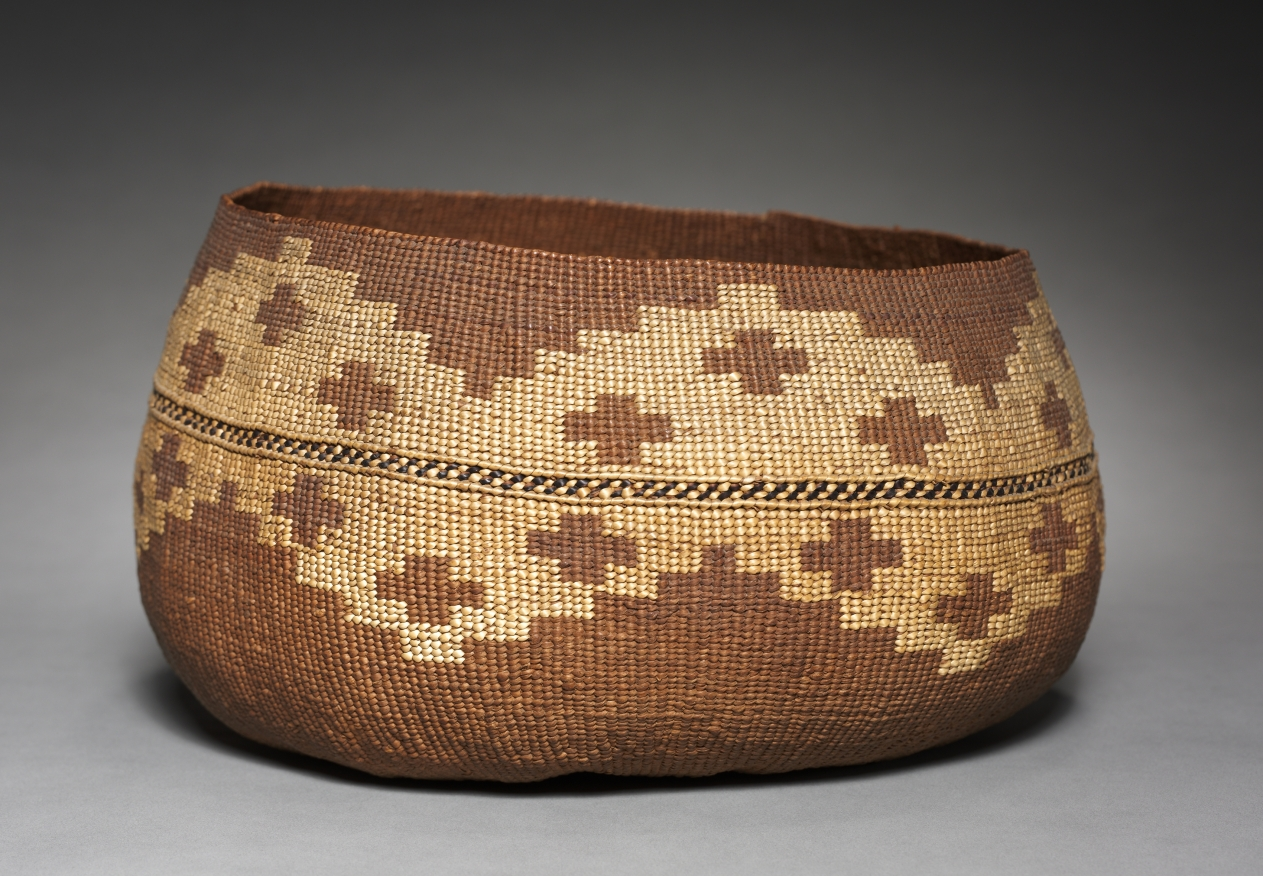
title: Cooking Bowl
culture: California, Karok or Hupa, Unassigned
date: Unassigned, before 1942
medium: twined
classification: Basketry